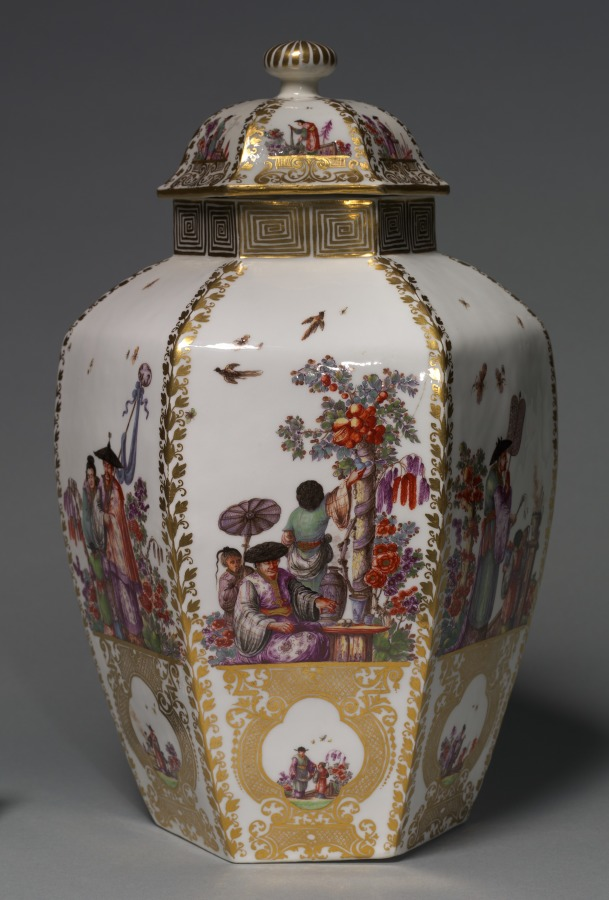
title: Covered Vase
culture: Germany, Meissen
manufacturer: Meissen Porcelain Factory (German, est. c. 1710)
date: c. 1728–30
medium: porcelain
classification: Ceramic